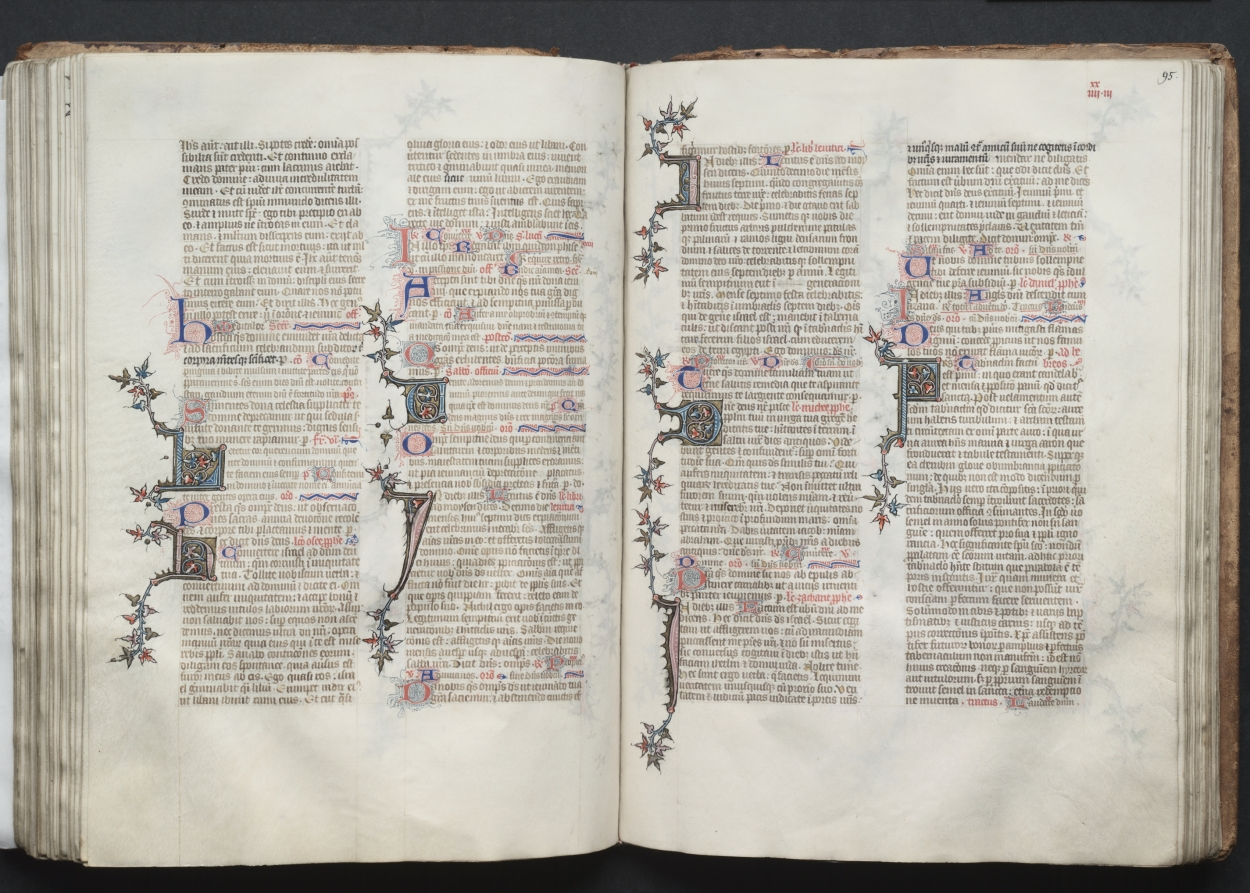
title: The Gotha Missal: Fol. 94v, Text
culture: France, Paris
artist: Master of the Boqueteaux (French)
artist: and Workshop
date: c. 1375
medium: ink, tempera, and gold on vellum; blind-tooled leather binding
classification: Bound Volume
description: The style and quality of this manuscript's decoration is typical of deluxe Parisian books made for aristocratic or royal patrons. Most of the book's decoration appears to be the work of the Master of the Boqueteaux, an artist active at the court of King Charles V (died 1380). His style was apparently shared by a number of book illuminators working in and around Paris. It is very possible that the Gotha Missal belonged to Charles V, but is not provable because the manuscript has no royal portraits and lacks a colophon. Given the book's magnificent decoration, however, it would seem that it was produced for a Valois prince, if not for the king himself. The manuscript receives its name from the German dukes of Gotha, its later owners.